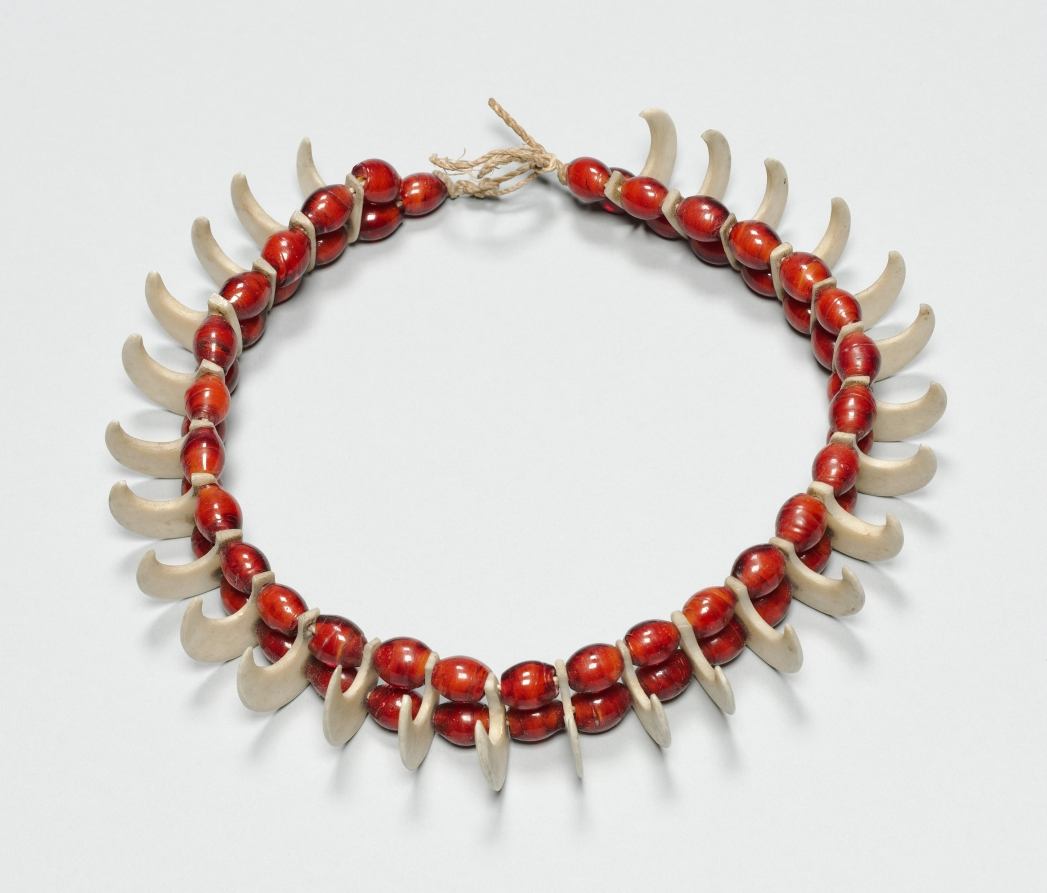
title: Necklace (amazipho)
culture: Africa, Southern Africa, South Africa, Southeast Cape Region, Northern Nguni (Zulu)-style maker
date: 1800s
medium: Glass beads, bone, and sinew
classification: Jewelry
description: When wild game was still plentiful in the region, real animal claws would have been used to punctuate beaded prestige necklaces. Lion-claw necklaces were the exclusive property of royalty while the bone imitations were owned and worn by high-ranking individuals of lesser status. Large red glass beads were also reserved for the Nguni elite in the period before the destruction of the Zulu kingdom in 1879.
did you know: Large red glass beads like the ones in this necklace were reserved for the Nguni elite.